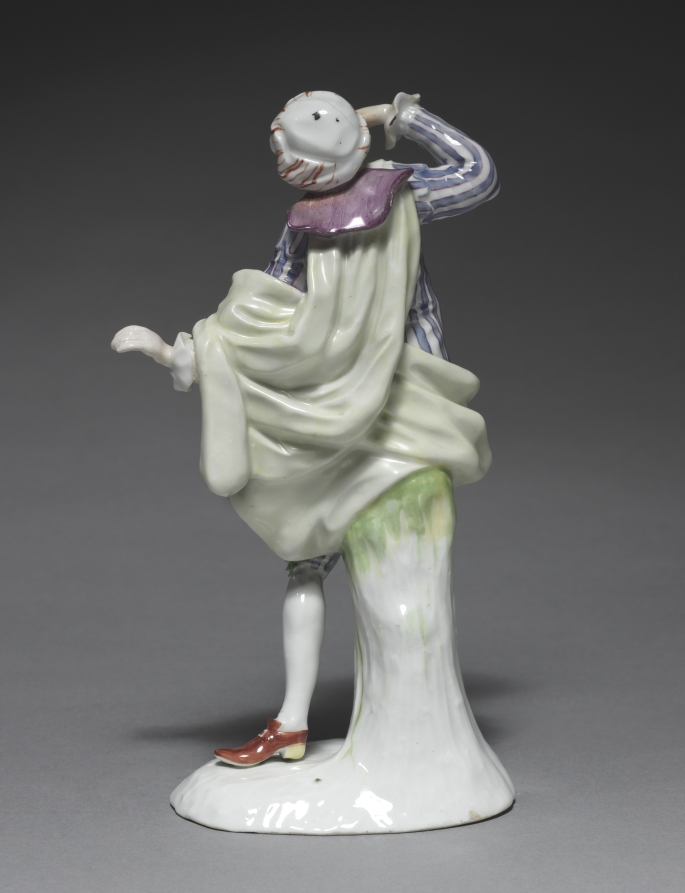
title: Italian Comedy Figure: Mezetin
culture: Germany, Brunswick, 18th century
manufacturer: Fürstenberg Porcelain Factory (German)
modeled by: Simon Feilner (German, 1798)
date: c. 1753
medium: porcelain with enamel decoration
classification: Ceramic